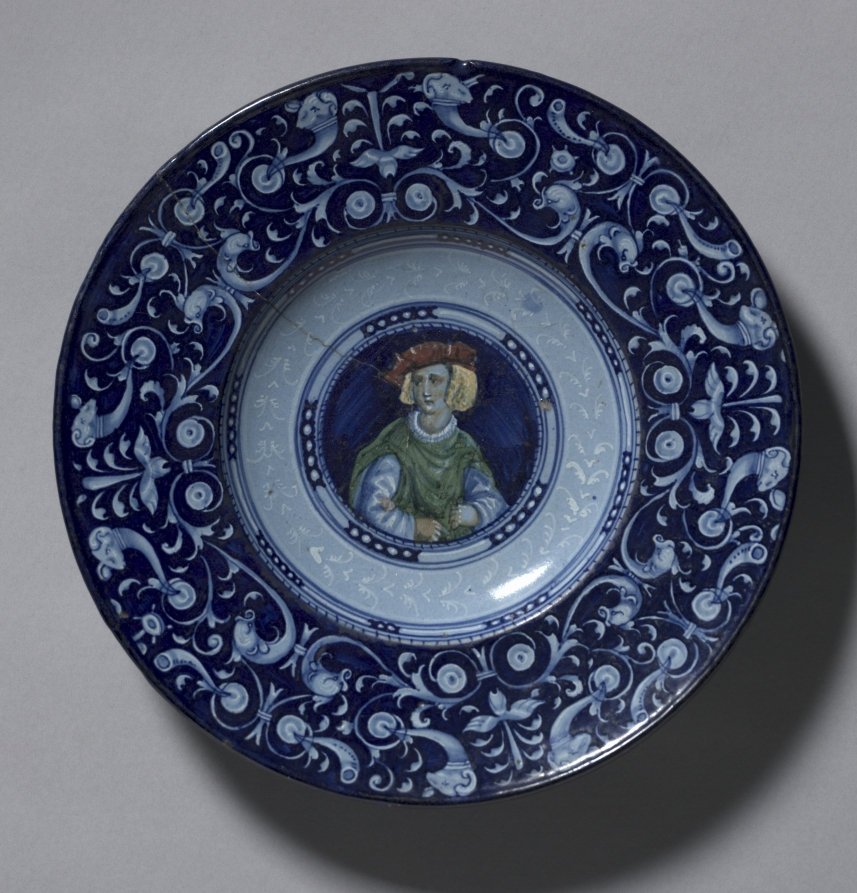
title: Plate with a Portrait of a Gentleman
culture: Italy, Faenza, 16th century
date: c. 1525–30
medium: tin-glazed earthenware (maiolica)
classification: Ceramic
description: Italian nobles of the 1500s often expressed their wealth, social status, and sophistication by ordering large sets of maiolica that sometimes carried their coats of arms or even likenesses, usually in profile similar to portrait paintings of the period. Reserved for use at festival events such as a wedding or commissioned to mark a special occasion or an important visit, elaborately decorated utilitarian vessels in maiolica were prized as works of art by their owners and displayed as such in their residences.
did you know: The gentleman featured in the center of this plate wears a chaperon, a type of hat that first became popular during the 1300s.